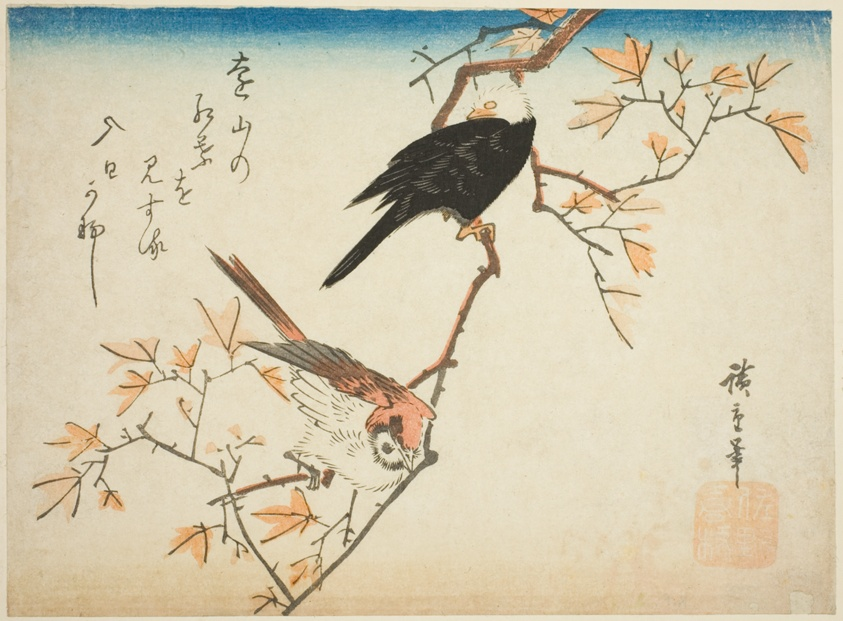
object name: Print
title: Two birds on maple branch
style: Japanese (culture or style)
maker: Utagawa Hiroshige 歌川 広重; Japanese, 1797-1858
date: 1830s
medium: Color woodblock print; chuban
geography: Japan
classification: woodblock print; print; asian art